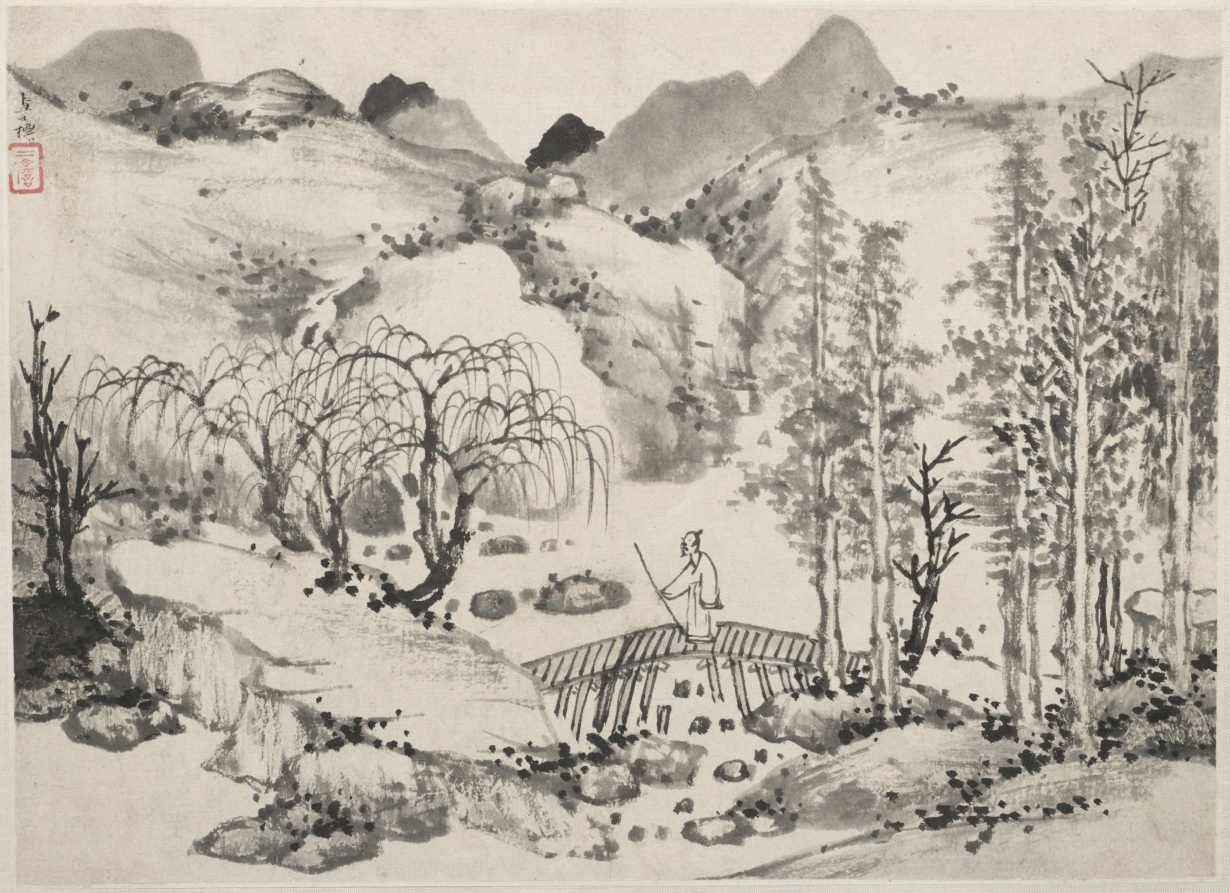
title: Landscape Album in Various Styles: Landscape with Artist on a Bridge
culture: China, Qing dynasty (1644-1911)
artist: Zha Shibiao (Chinese, 1615–1698)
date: 1684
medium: album leaf, ink and light color on paper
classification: Painting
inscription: 查士標 [印] 二瞻